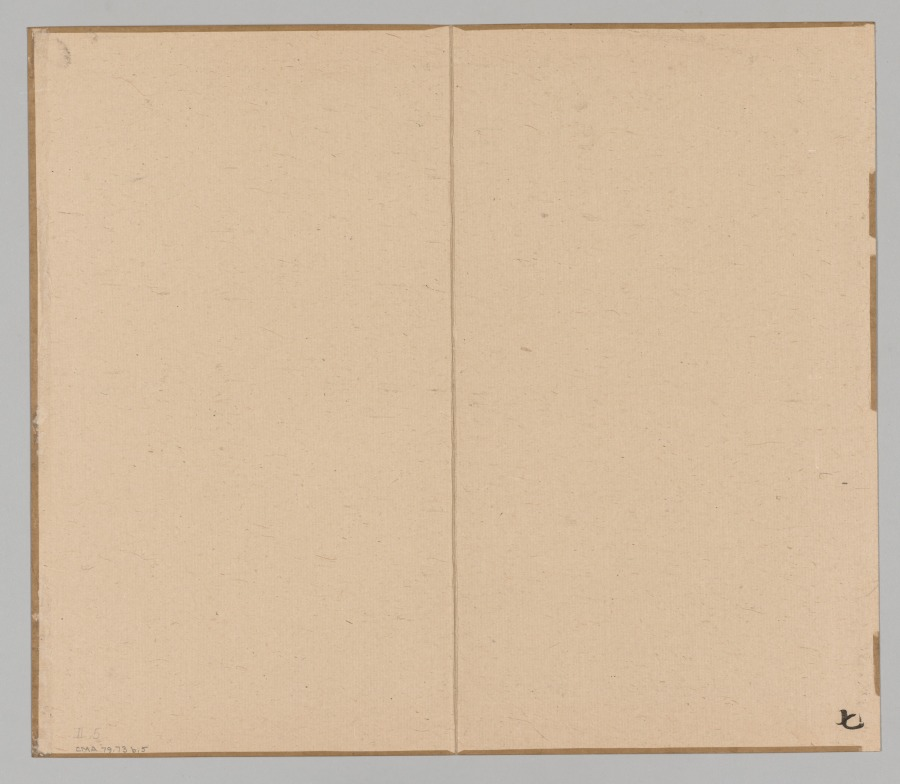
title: Reverberations of Taiga, Volume 2 (leaf 5)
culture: Japan, Edo period (1615–1868)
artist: Aoki Shukuya (Japanese, d. 1802)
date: mid- to late 1700s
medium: double-leaf from a pair of albums; ink and light color on paper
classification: Portfolio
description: Traditionally, young painters in Japan began their studies with an established master-painter. The master's compositions invariably became models that the apprentice copied to learn various ink and brush techniques. Shukuya was a pupil of the famous Kyoto artist Ikeno Taiga, whose style is reflected in these sketches of rocks, trees, and mountains.